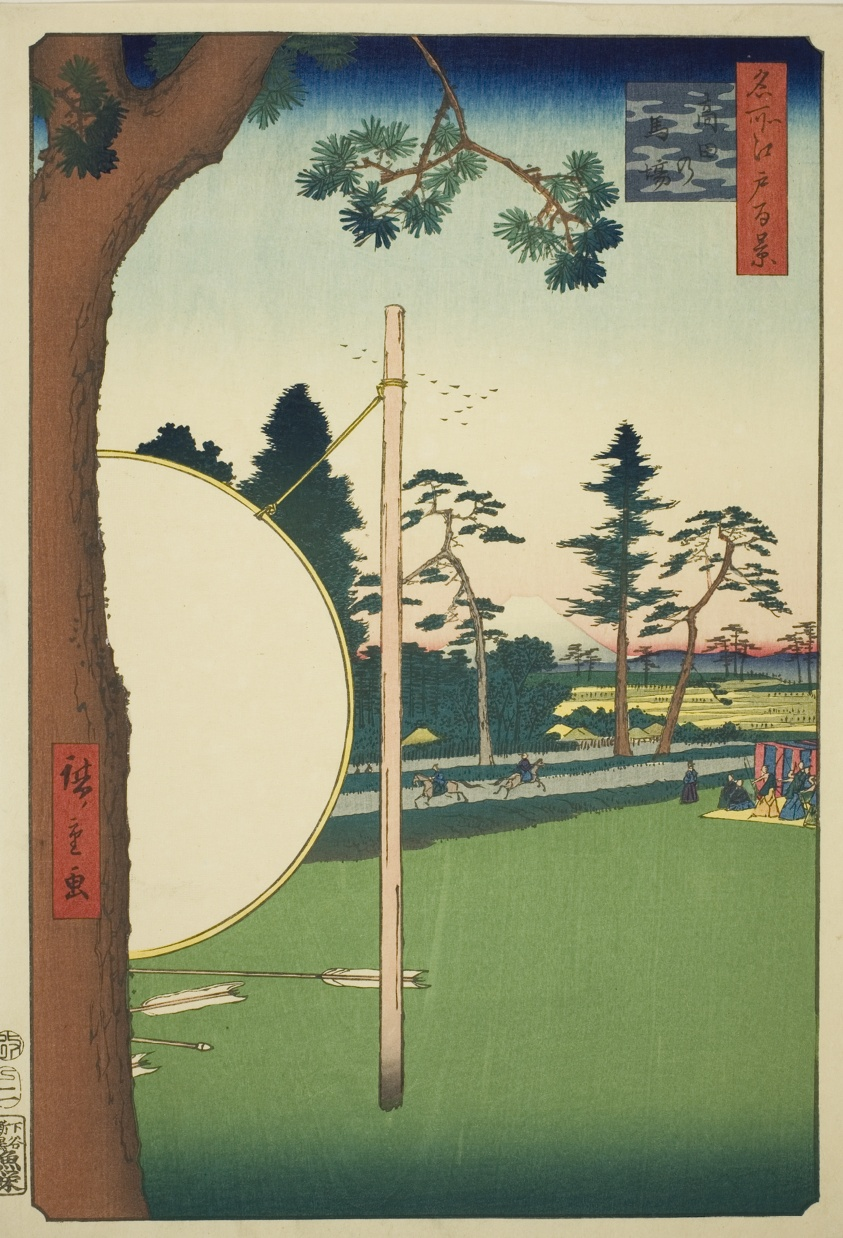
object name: Print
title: Takata Riding Grounds (Takata no baba), from the series “One Hundred Famous Views of Edo (Meisho Edo hyakkei)”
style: Japanese (culture or style)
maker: Utagawa Hiroshige 歌川 広重; Japanese, 1797-1858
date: 1857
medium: Color woodblock print; oban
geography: Japan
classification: woodblock print; print; asian art